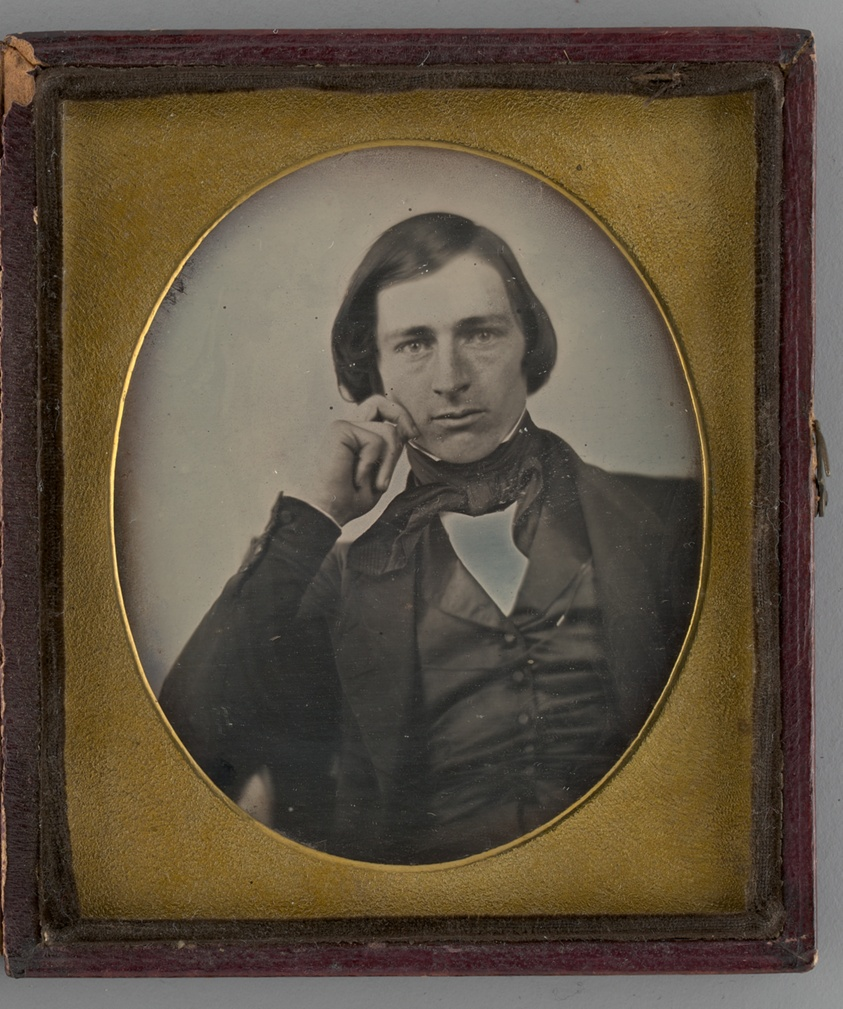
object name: Photograph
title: Untitled (Portrait of Seated Man)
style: 19th century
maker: Unknown maker; American, 19th century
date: 1843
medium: Daguerreotype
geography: United States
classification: portrait; photograph; photographic process; photography; portrait; daguerreotype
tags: lundberg collection, portraits, portraits: male subject